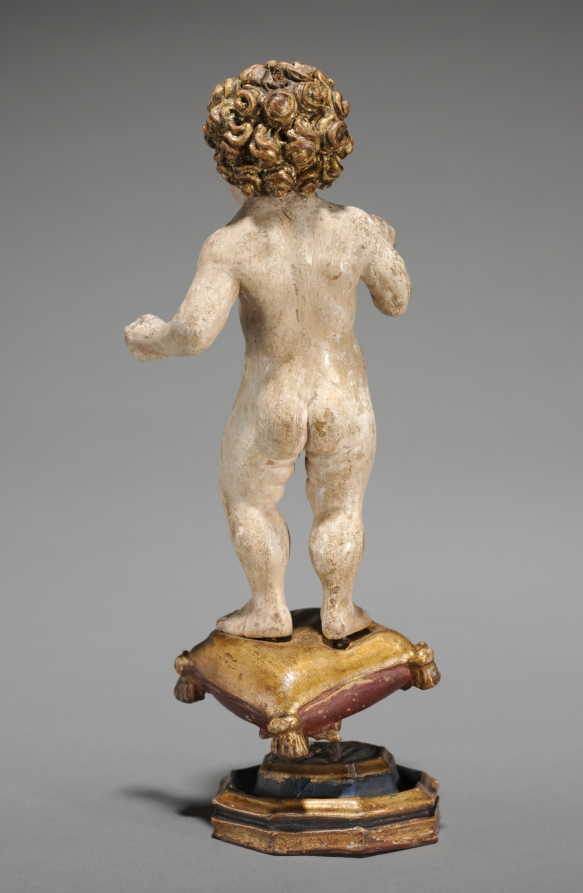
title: The Christ Child Holding a Pomegranate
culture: South Germany, 16th century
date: c. 1510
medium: painted wood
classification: Sculpture